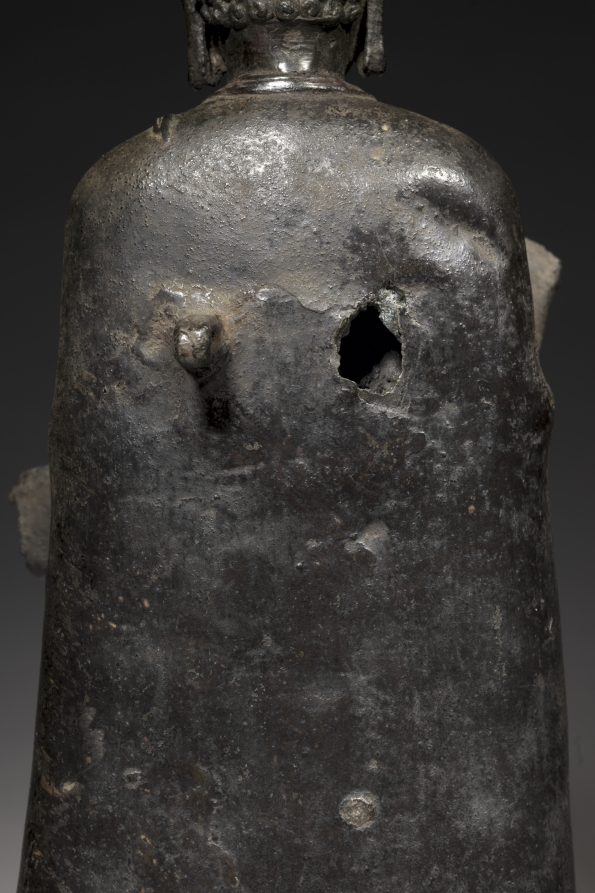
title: Standing Buddha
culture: Northern India, Uttar Pradesh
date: 591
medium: bronze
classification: Sculpture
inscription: 1. ṹ deyadharmmoyaṃ laḍitagrāme yaṃgvalvihāre śā[kya] bhikṣuṇyā 2. pariśuddhamatyā yadattra puṇyaṃ tadbhavatu sarvvasatvānā- 3. manuttarasarvva jñānāvāptaye/ / saṃvat 4a. 500 10 3/ / caityakūta jinabandhuvihārapūrvva-bhuddeśe 4b. piṇḍakena bhojanaṃ karttavya*/ / *Mistake for karttavyam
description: This bronze Buddha is exceptional, because it carries an inscription on its base that dates its manufacture to the year 591. According to the inscription, the sculpture was dedicated by a nun who was from a village in Nepal, but she probably commissioned it at a workshop in northern India. The Buddha's robe on this image has been left plain, without pleat lines to obscure the beauty of the contours of the body. Only the rippling scalloped clusters of the garment’s hem lend some sense of energy and subtle ornament to the composition.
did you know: Around the time when this sculpture was made, portable bronzes began to replace relics as the principal sacred commodity circulating in the Buddhist world.